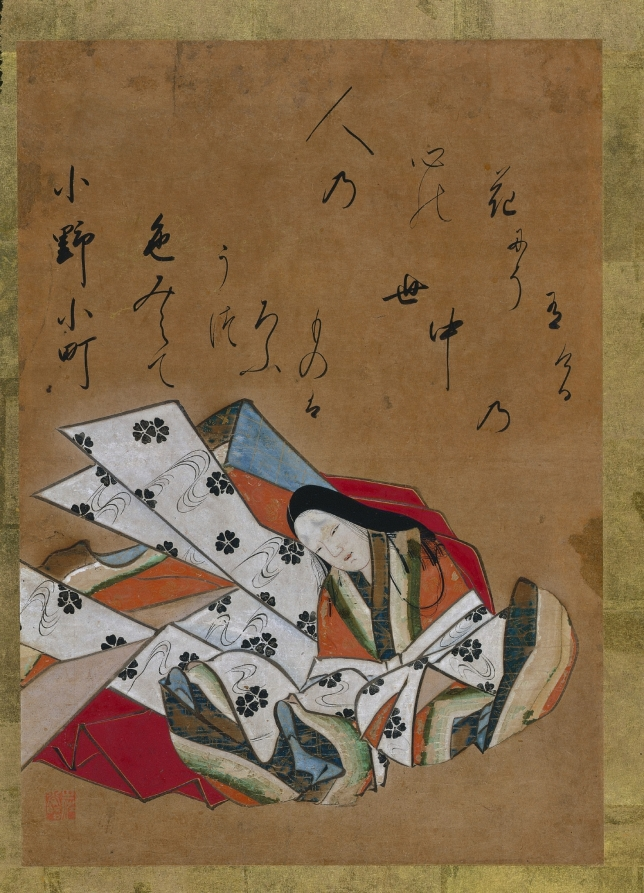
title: The Poet Ono no Komachi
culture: Japan, Edo period (1615–1868)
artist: Shokadō Shōjō (Japanese, 1584–1639)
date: early to mid-1600s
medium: album leaf; ink and color on paper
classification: Painting